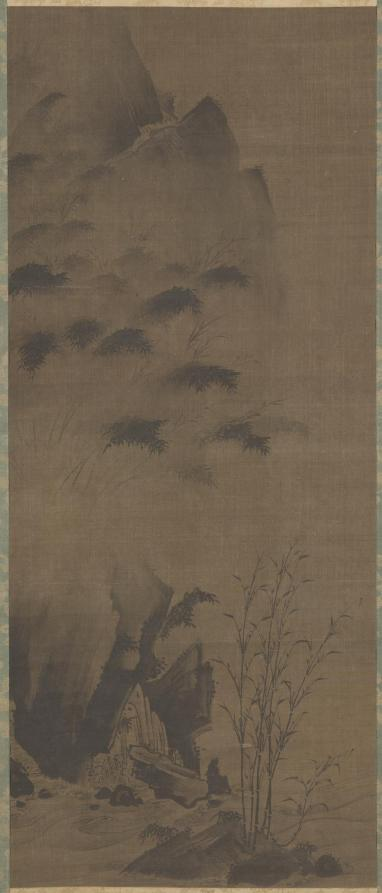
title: Bamboo in Wind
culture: Japan, Muromachi period (1392–1573)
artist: attributed to Genga (Japanese)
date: early 1500s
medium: hanging scroll; ink on silk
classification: Painting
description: East Asian paintings from China, Korea, and Japan were frequently conceived as sets of multiple images. These sets might have been composed for specific palace or temple rooms, or to portray a specific theme, such as the four seasons. Over time, the original intent of such sets is often lost through damage, changes in ownership, or a variety of other reasons. The identity of the artist can also be lost, but then, sometimes, retrieved. This pair of ink paintings has traditionally been labeled as Japanese and attributed to the 16th-century painter Genga. Since there are no seals or signature of the artist on the painting, this attribution was based on comparisons of brush style with paintings known to be by Genga. More recent study indicates that while the 16th century is an appropriate time frame for the pair, the precise cultural identity of the artist is not certain after all. The dark, eccentric shapes of the rocks and bamboo clusters and the dramatic tonal contrasts evident throughout the composition point to either Korean authorship or influence upon a Japanese painter of the period.